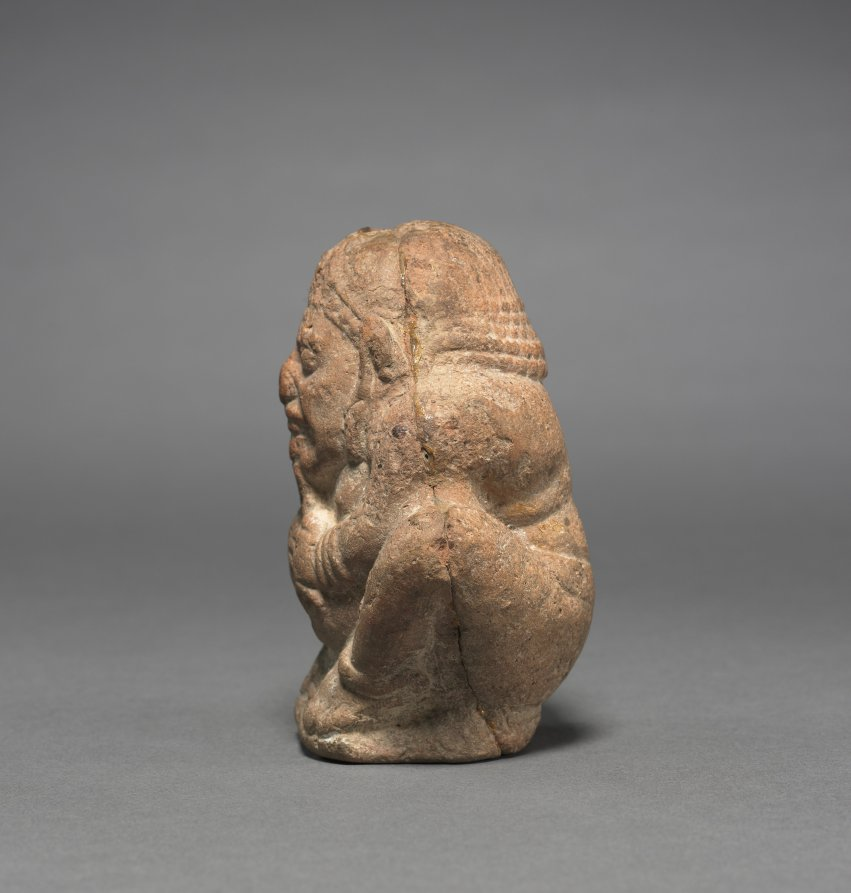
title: Crouching Dwarf Musician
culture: India, Shunga period (185–78 BCE)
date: 200–100 BCE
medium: terracotta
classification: Sculpture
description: Images of dwarfs referenced the fertility of the earth. With lush curling hair, portly full body, and visible genitals, this figure squats close to the earth and plays on a double flute pipe instrument.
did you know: Two holes at the top and bottom of the figure indicate that this object worked as a whistle.